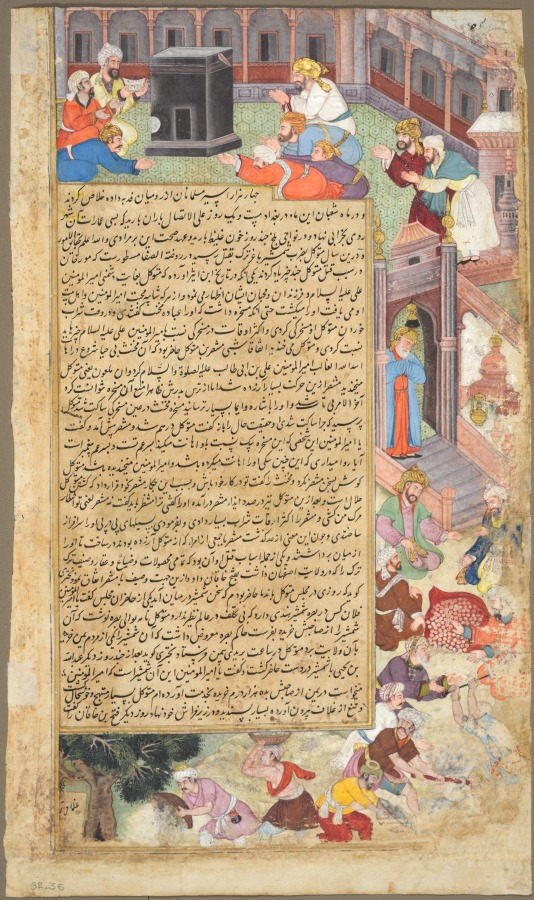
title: Page of disasters, from the Tarikh-i Alfi (History of a Thousand Years)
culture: India, Mughal school, 16th century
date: c. 1595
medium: Gum tempera, ink, and gold on paper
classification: Painting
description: A distinctive feature of this manuscript is the descriptive painting surrounding the blocks of text. At the top of this page is a depiction of the sacred center of Islam, the black stone structure called the Ka‘ba in Mecca that the Prophet Muhammad cleansed of pre-Muslim idols. The Ka‘ba is the endpoint of the Islamic pilgrimage that all Muslims are enjoined to make at least once during their lifetime. Remarkably, Akbar’s name appears on the page of the book held by a devotee, where only prayers or Qur'anic passages should be found. During the time of the caliph who persecuted Shi‘ites, Mecca experienced a drought. Fountains of water now were dry, and pilgrims had to buy water that was carried there.